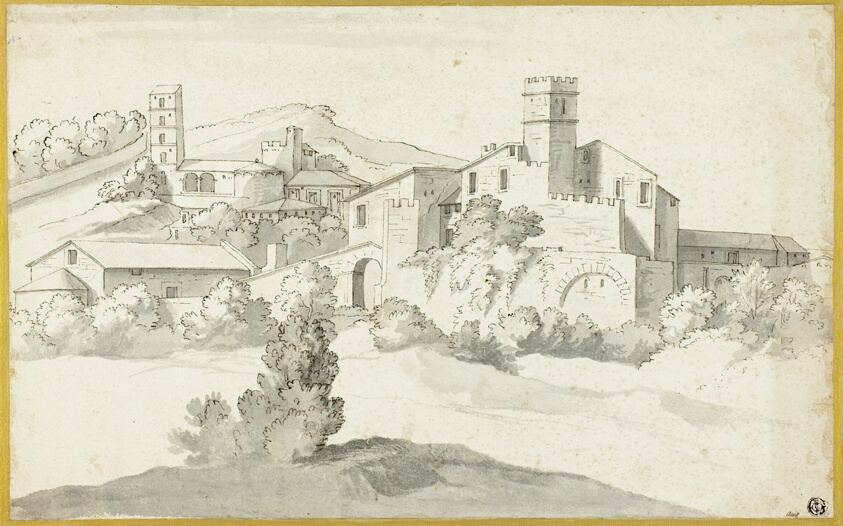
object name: Drawing and Watercolor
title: Landscape with an Old Castle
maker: Attributed to Michel Ange Houasse; French, 1680-1730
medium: Pen and brown ink, with brush and gray wash, and traces of graphite, on ivory laid paper, laid down on cream laid paper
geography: France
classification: pen and ink drawings; drawings (visual works); prints and drawing